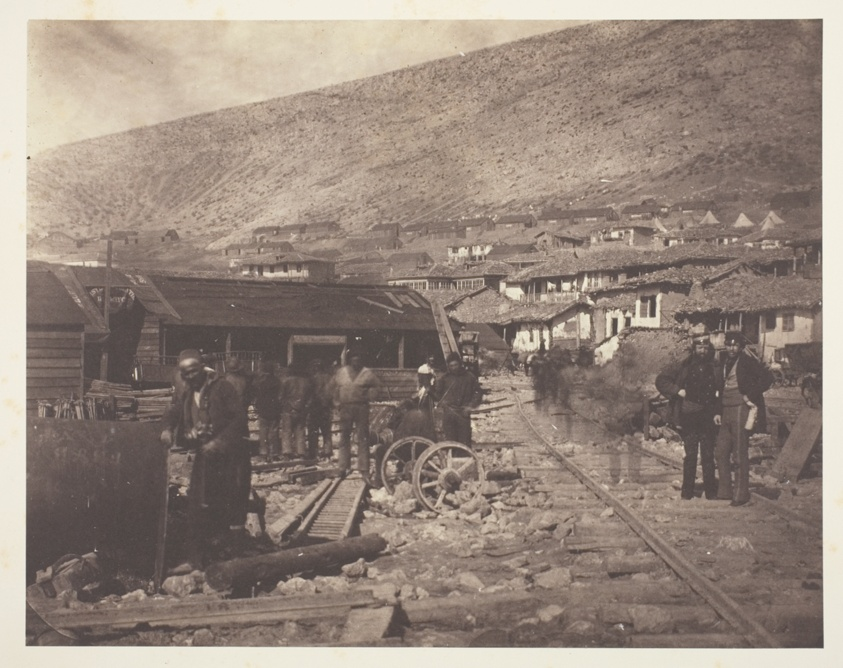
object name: Photograph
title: The Railway Yard, Balaklava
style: 19th century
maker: Roger Fenton (English, 1819–1869)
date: 1855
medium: Salted paper print, from the album "Photographic Pictures of the Seat of War in the Crimea" (1856)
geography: England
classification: salted paper print; photographic process; photography; photograph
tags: Collected by Hugh Edwards